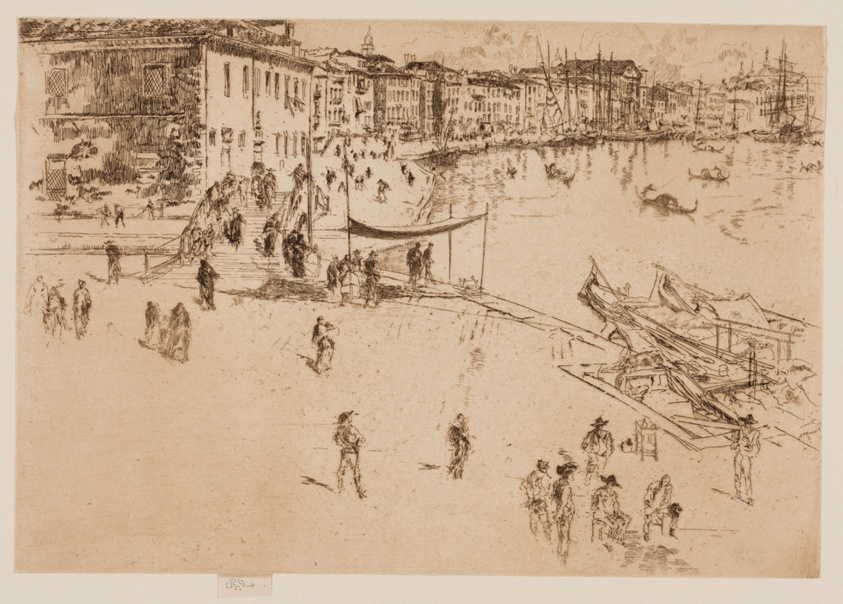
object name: Print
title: Riva, No. 2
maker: James McNeill Whistler (American, 1834-1903)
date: 1879/80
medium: Etching and drypoint with foul biting in brown ink on ivory laid paper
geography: United States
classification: etching; drypoint; print; prints and drawing; foul biting; paper